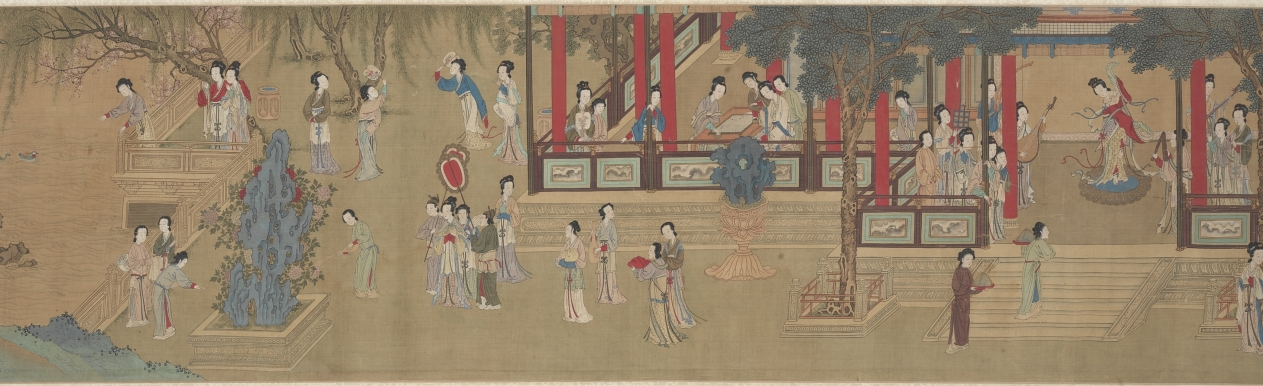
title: Palace Ladies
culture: China, Qing dynasty (1644-1911)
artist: copy after Qiu Ying (Chinese, 1494–1552)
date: 1644–1911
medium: handscroll, ink and color on silk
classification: Painting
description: This handscroll illustrates the pursuits of court ladies in a palace precinct on a spring day. Women, young girls, and their maids amuse themselves by sitting on a swing, playing games, watering and admiring peonies, performing music together, playing the qin (zither), feeding a parrot on the balustrade and fish in the water, or catching butterflies. The life of elite women was mostly restricted to the so-called inner quarters, meaning the garden and inner courts of the house. This painting idealizes the world of young palace girls that in fact was often filled with boredom and waiting for a lover.